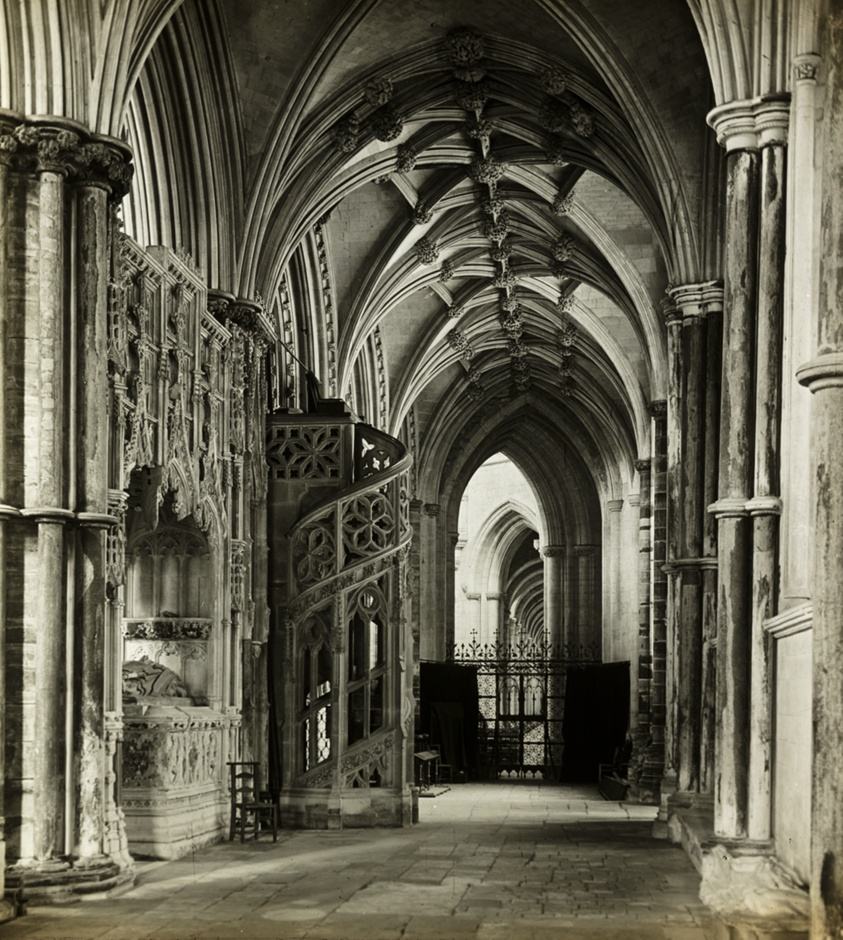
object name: Photograph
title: Ely Cathedral: North Choir Aisle to West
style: Pictorialism, 19th century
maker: Frederick H. Evans (English, 1853–1943)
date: 1891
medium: Lantern slide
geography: England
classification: photograph; photography